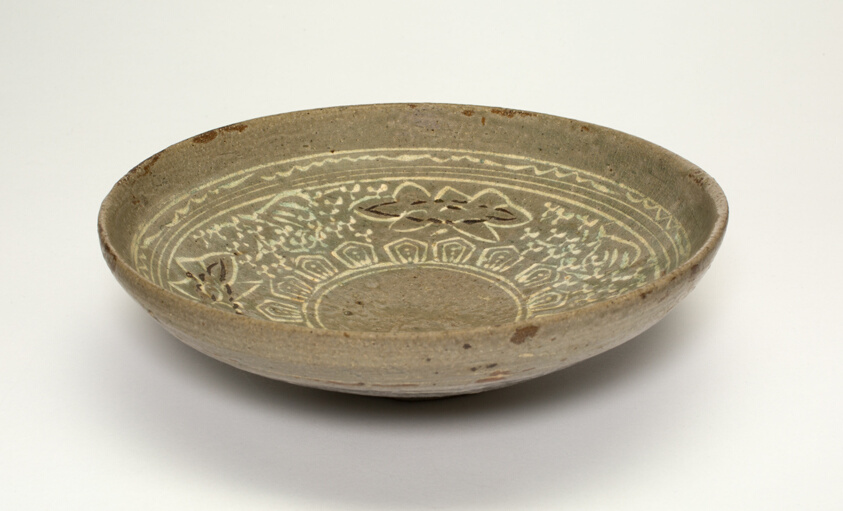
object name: Vessel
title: Low Bowl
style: Korean (culture or style)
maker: Korea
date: Goryeo dynasty (918–1392), 14th century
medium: Celadon-glazed stoneware with underglaze inlaid decoration of black and white clays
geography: Korea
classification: bowl; dish (vessel); ceramics; vessel